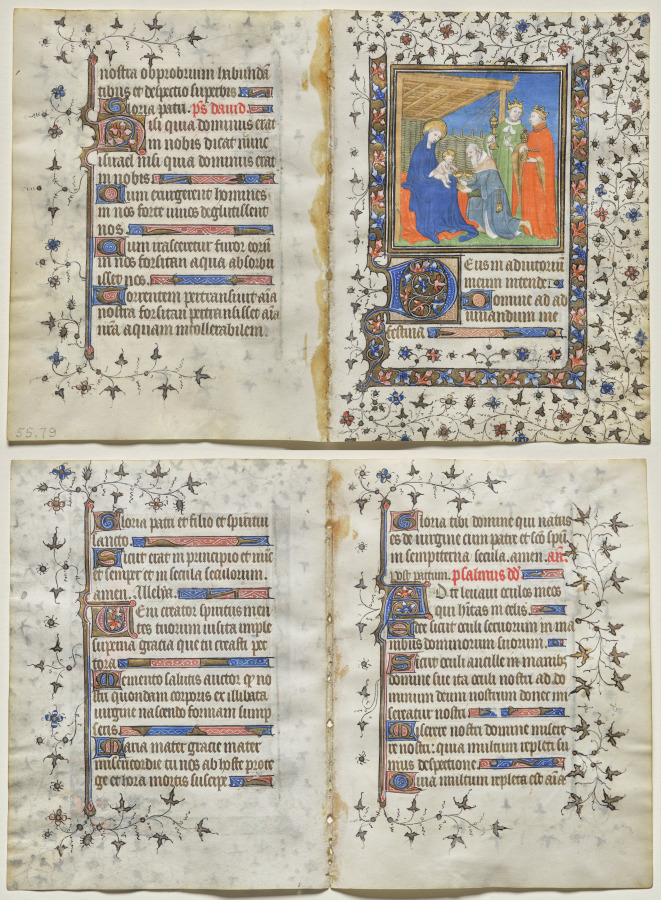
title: Bifolio from a Book of Hours: Adoration of the Magi (recto); Text (verso)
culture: France, Paris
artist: workshop of Boucicaut Master (French, Paris, active about 1410–25)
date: c. 1415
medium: ink, tempera, and gold on vellum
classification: Manuscript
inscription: Deus in adiutorium meum intende. Domine, ad adiuvandum me festina.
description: Books of hours were devotional books popular in the Middle Ages. Meant for laypeople, or those not in the clergy, they were used at home and contained daily prayers as well as prayers for specific occasions, such as death, plague, warfare, travel, or bad weather. The heart of every book of hours is the Hours of the Virgin. With this set of prayers, the reader asked the Virgin Mary to intercede on their behalf. The Adoration of the Magi opens sext, the sixth hour of the day, or noon. The Coronation of the Virgin begins compline, which is before retiring for the evening.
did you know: All books of hours contain the same basic sections and were highly customizable.